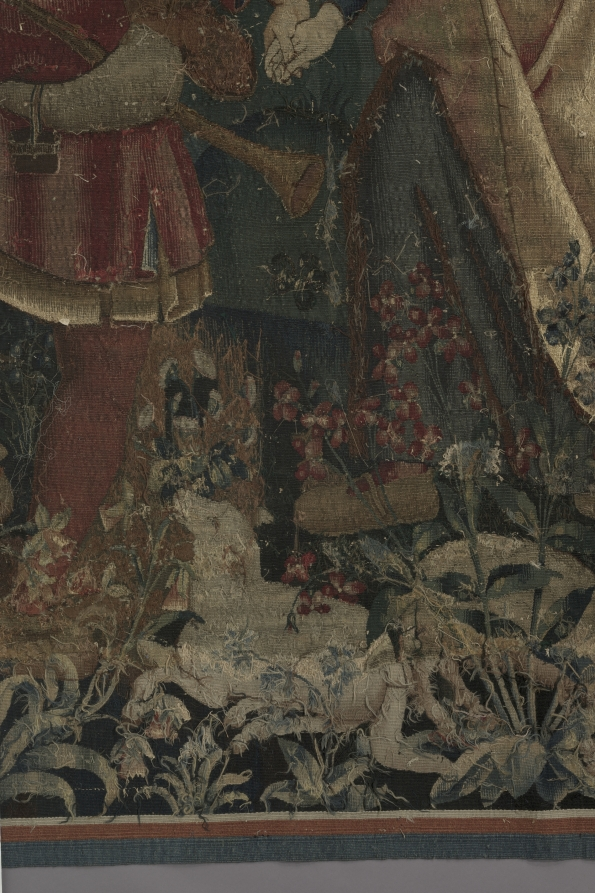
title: Shepherds in a Round Dance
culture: Netherlands, early 16th century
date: around 1500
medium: Wool and silk: tapestry weave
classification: Tapestry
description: Late medieval tapestries often use a limited yet contrasting color palette to portray stylized images. The expressions of these figures, for example, are conveyed more by their postures than by their faces. Four shepherds and shepherdesses join hands and dance to the music of a bagpiper at the far right, while a lord and two ladies on the left look on. A dog and sheep amid blossoming plants and trees contribute to the festive pastoral scene in front of a castle.